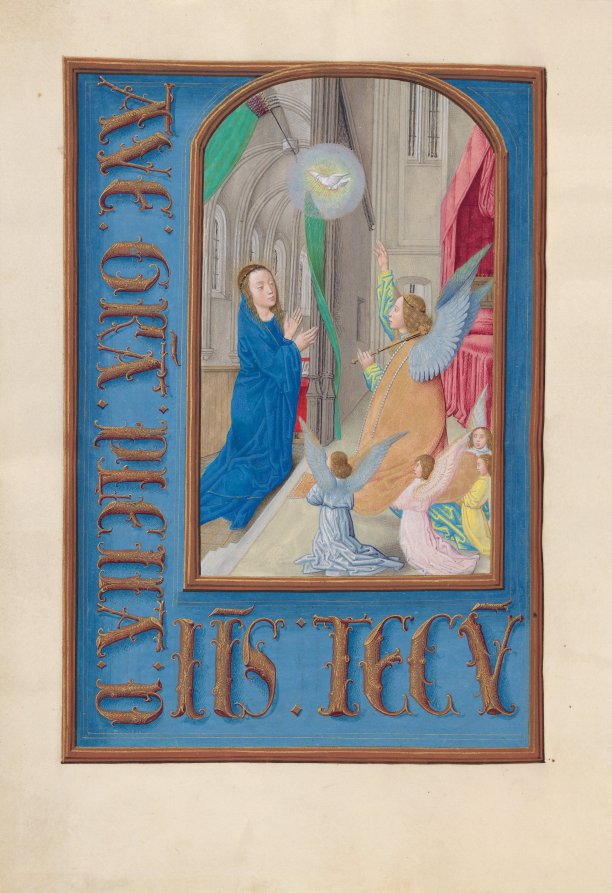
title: Hours of Queen Isabella the Catholic, Queen of Spain: Fol. 97v, Annunciation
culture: Flanders, Ghent and Bruges, late 15th century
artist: Master of the First Prayerbook of Maximillian (Flemish, c. 1444–1519)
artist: and Associates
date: c. 1500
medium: ink, tempera, and gold on vellum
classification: Bound Volume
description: This manuscript was illuminated by a circle of at least five highly organized manuscript painters active in the Flemish cities of Ghent and Bruges. The principal illuminator was Alexander Bening, who painted the majority of the book's miniatures. Manuscripts produced by this circle of artists are renowned for the decoration of their borders, which typically feature a rich variety of realistically-painted flowers, birds, and butterflies. This prayer book, called a book of hours, was intended not for a cleric, but for the private devotions of a lay person-in this case, Isabella the Catholic, Queen of Spain (1451-1504). Isabella's coat of arms embellishes the book's frontispiece. It is unlikely that the book was commissioned by the Queen herself; rather, she probably received it as a diplomatic gift from someone courting her patronage, perhaps Cardinal Francisco Jimenez de Cisneros. A Franciscan friar, Jimenez was dependent upon Isabella for his advancement, first to the post of Queen's confessor in 1492, and then to Archbishop of Toledo in 1495.